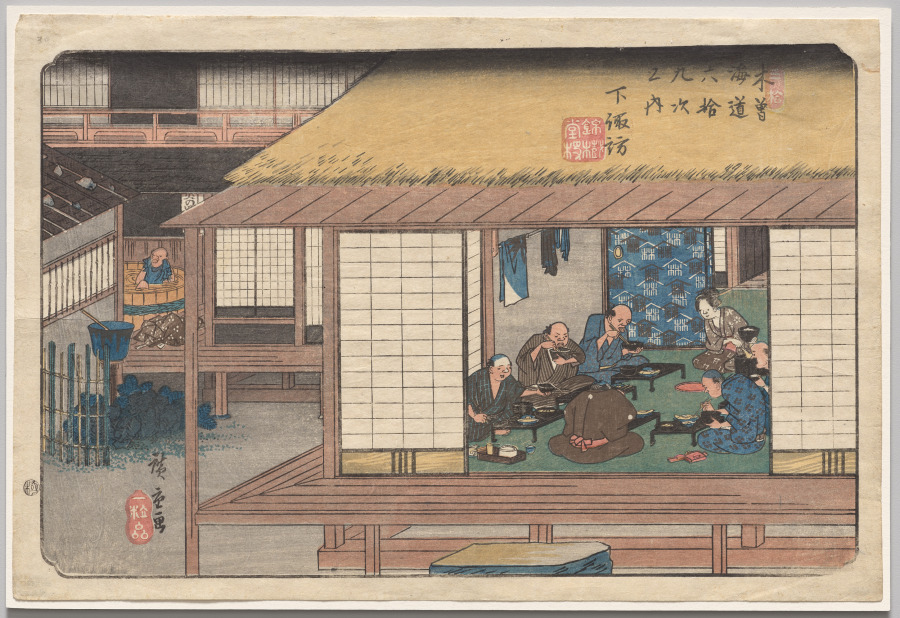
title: Shimosuwa, from Sixty-Nine Stations of the Kisokaidō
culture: Japan, Edo period (1615–1868)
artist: Utagawa Hiroshige (Japanese, 1797–1858)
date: 1835–38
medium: Color woodblock print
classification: Print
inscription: Signature: Hiroshige ga. Artist Seal: Ichiryusai. Publisher: Iseya Rihei (Kinjudo han). Censorship Seal: kiwame.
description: This print shows travelers enjoying a meal at an inn, with the innkeeper looking pleased at the guests’ enthusiasm. In the background, another traveler is gratefully relaxing in a wooden tub filled with hot natural spring water, having discarded his robe next to the bath. Shimosuwa was the only stop along the Kisokaidō—a 534-kilometer (332-mile) road running from Nihonbashi in Edo (now Tokyo) to Sanjō Ōhashi in Kyoto—with a natural hot spring. The print series was a collaboration between Utagawa Hiroshige and Keisai Eisen (1790–1848).